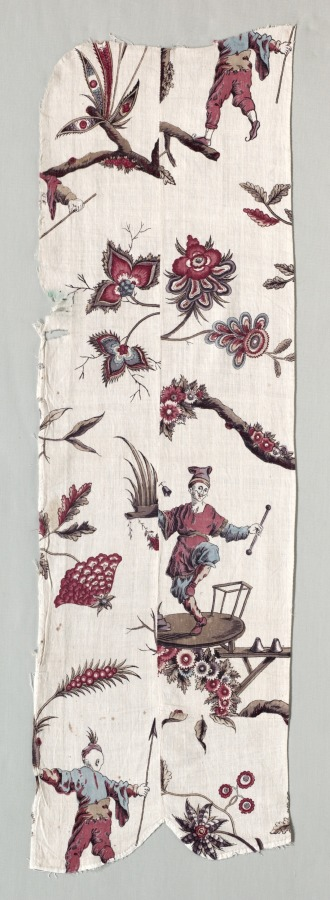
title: Woodblock Printed Textile Fragments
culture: France, late 18th century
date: c. 1785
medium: woodblock print on cotton and linen mixed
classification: Textile